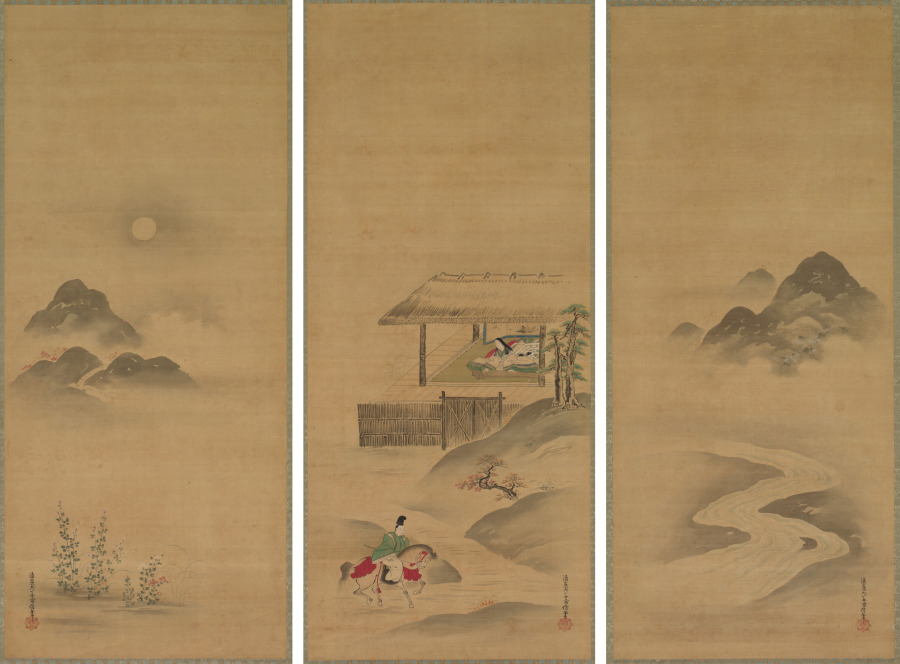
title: Minamoto no Nakakuni Visits Lady Kogō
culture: Japan, Edo period (1615–1868)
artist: Kiyohara Yukinobu (Japanese, 1643–1682)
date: late 1600s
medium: Triptych of hanging scrolls; ink and color on silk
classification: Painting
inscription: 款記「清原氏女雪信筆」/「清原女」朱文八角印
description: An aristocrat rides up a path to a residence where a woman plays a koto, a stringed instrument. The central composition is flanked on the right by a day-lit spring scene, and on the left by a nocturnal autumnal scene. The triptych presents an episode from The Tale of the Heike in which Minamoto no Nakakuni is sent by the emperor to look for Lady Kogō.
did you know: The Tale of the Heike chronicles the conflict between the Taira (Heike) and Minamoto (Genji) families in the late 12th century.